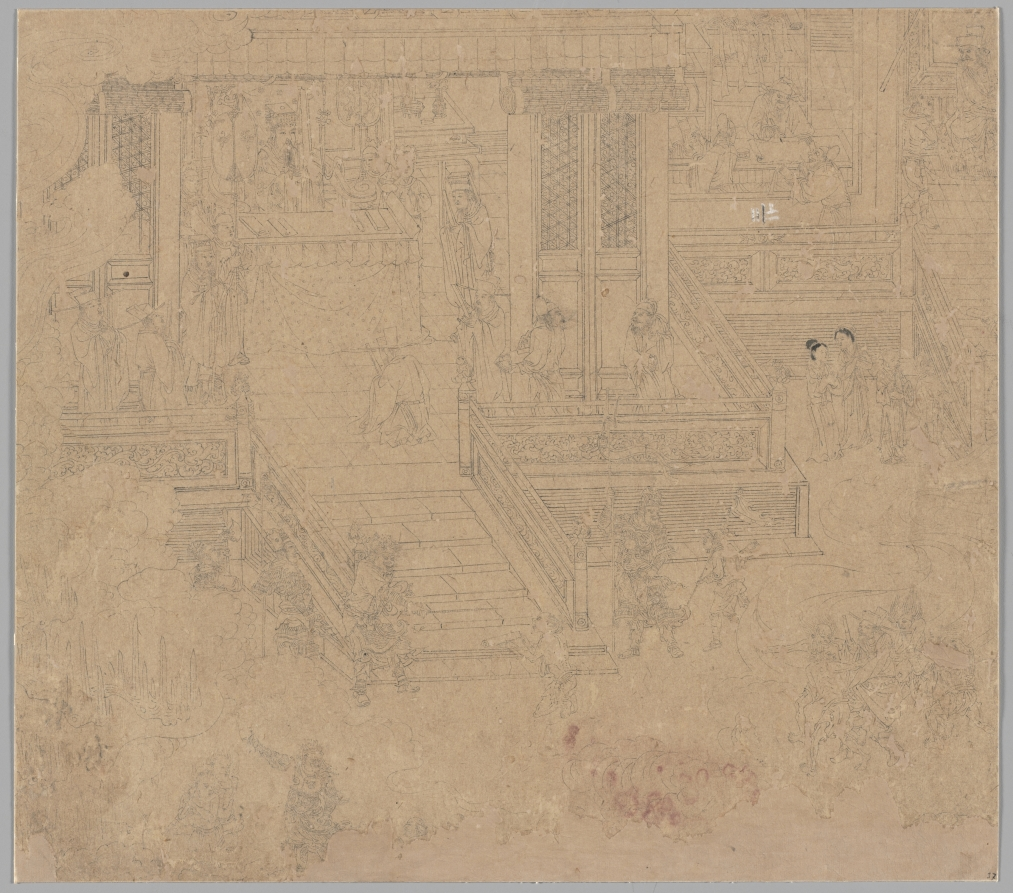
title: Album of Daoist and Buddhist Themes: Kings of Hells: Leaf 37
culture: China, Southern Song dynasty (1127-1279)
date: 1200s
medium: Album, ink on paper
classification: Painting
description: This extraordinary album has 50 paintings on a variety of religious subjects. They were likely created by several master craftsmen to share with studio apprentices as models for fulfilling commissions. The Jade Emperor and the Daoist pantheon make up the first 26 leaves. The next 14 leaves portray the Buddhist Ten Kings of Hell administering punishments to the dead. The third section, called “Clearing the Mountains,” features divine soldiers, led presumably by the deity Erlang Shen 二郎神, fighting undesirable creatures.